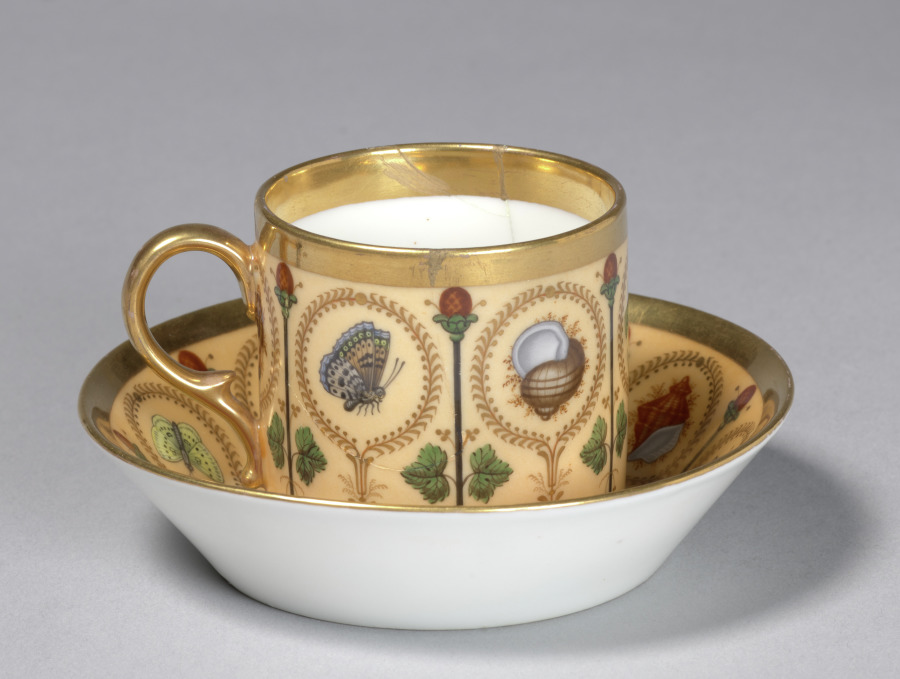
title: Cup and Saucer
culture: France, 19th century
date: c. 1800–1810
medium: porcelain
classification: Ceramic